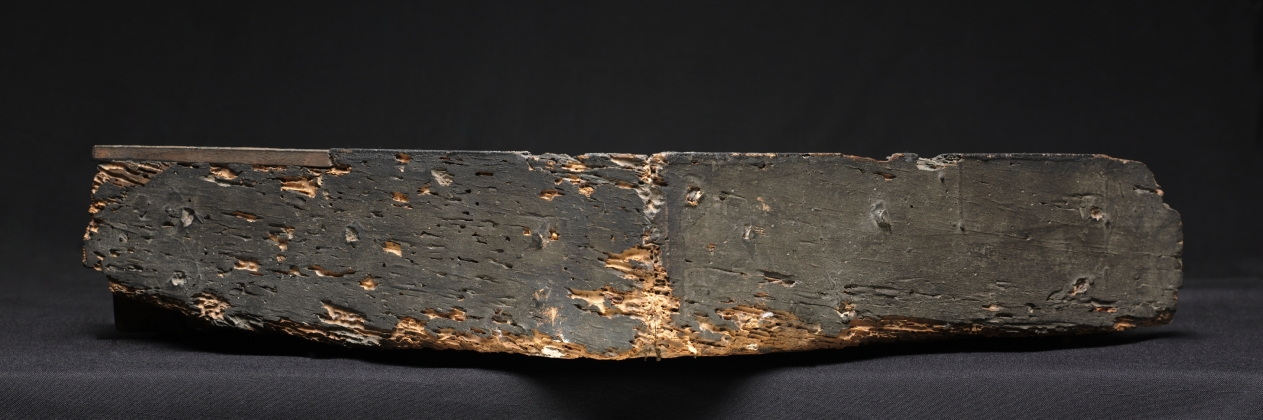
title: Madonna and Child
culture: Italy, 15th century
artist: Luca della Robbia (Italian, 1400?–1482)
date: c. 1460–1470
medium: glazed terracotta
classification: Sculpture